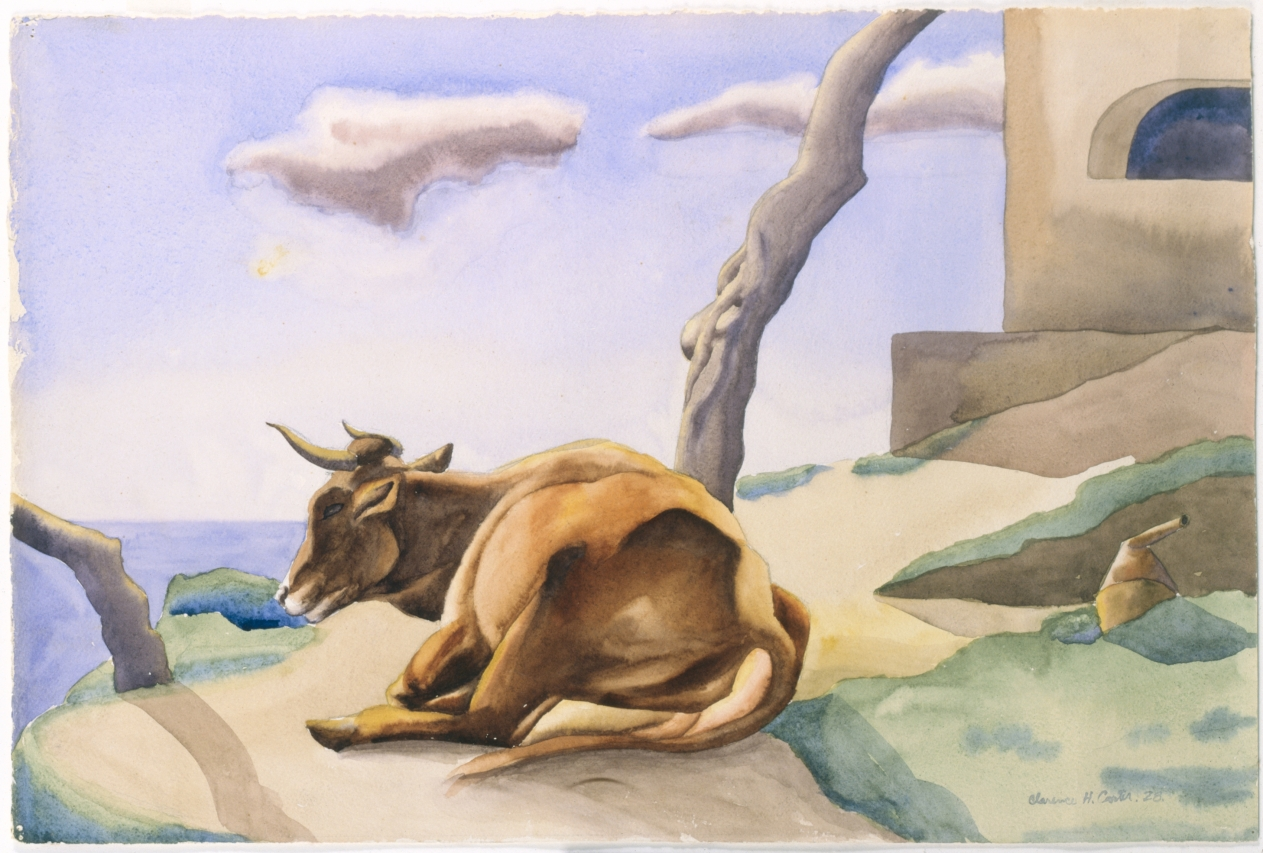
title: The Patient Cow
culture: America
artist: Clarence Holbrook Carter (American, 1904–2000)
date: 1928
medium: watercolor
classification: Drawing